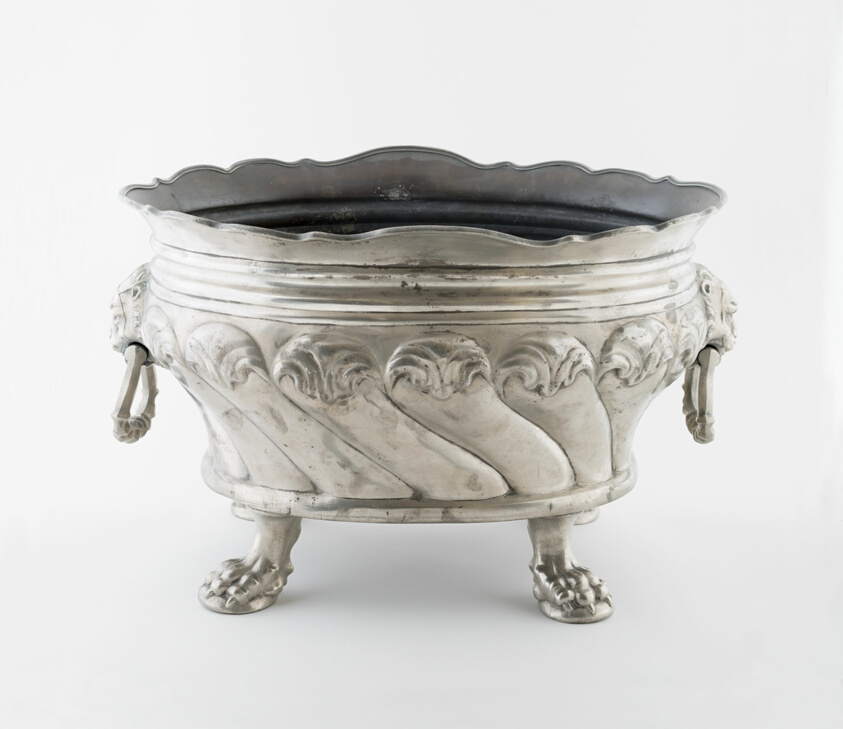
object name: Metalwork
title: Wine Cooler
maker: Southern Germany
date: 18th century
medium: Pewter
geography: Southern Germany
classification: pewter; metalwork; european decorative arts